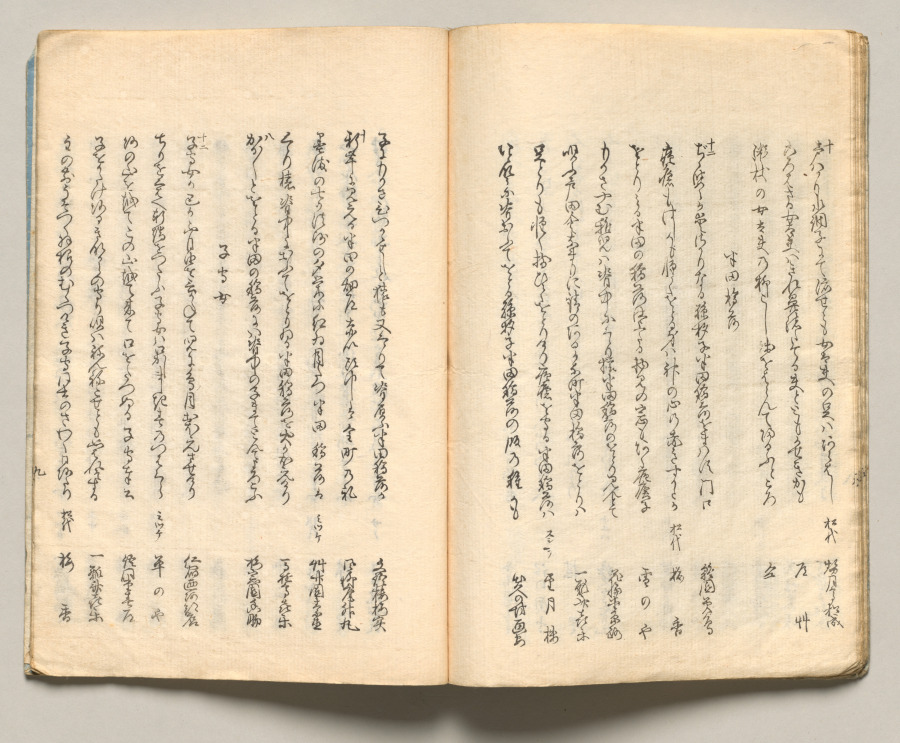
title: Spread Sixteen from Volume Six of People of Japan in Light Verse (Kyōka)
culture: Japan, Edo period (1615–1868)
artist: Utagawa Hiroshige (Japanese, 1797–1858)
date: 1857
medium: Woodblock-printed book; ink and color on paper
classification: Bound Volume